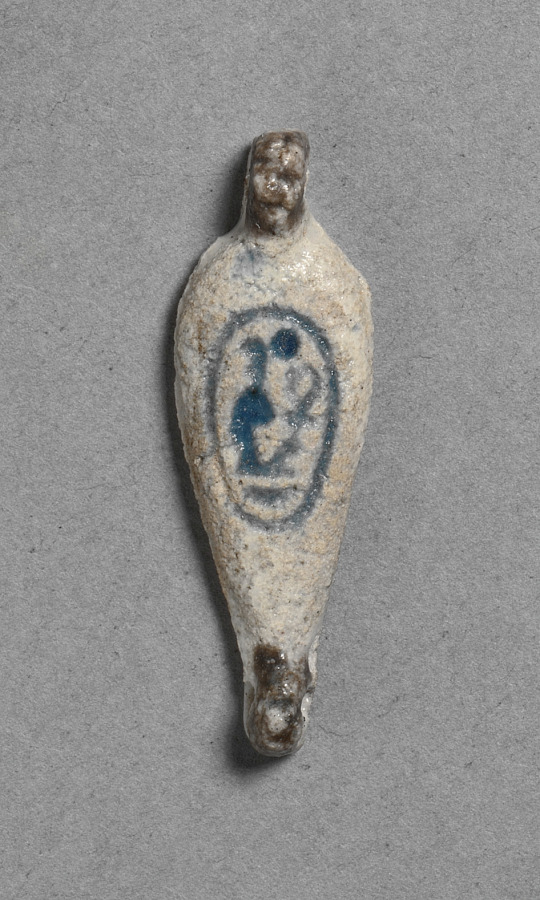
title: Petal-Shaped Bead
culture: Egypt, New Kingdom (1540–1069 BCE), Dynasty 18, reign of Amenhotep III (1390–1352 BCE)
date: c. 1391–1353 BCE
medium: faience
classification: Jewelry